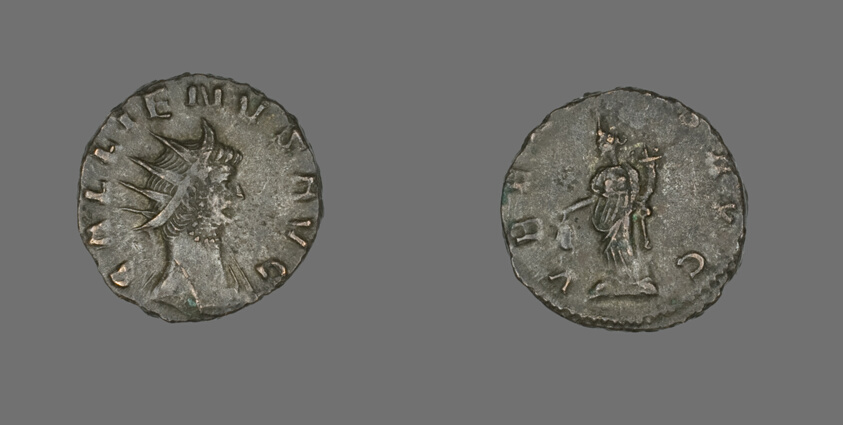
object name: Coin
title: Antoninianus (Coin) Portraying Emperor Gallienus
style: roman (ancient, style or period), ancient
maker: Roman, minted in Siscia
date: 260-268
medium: Billon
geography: Roman Empire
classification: coin; ancient art